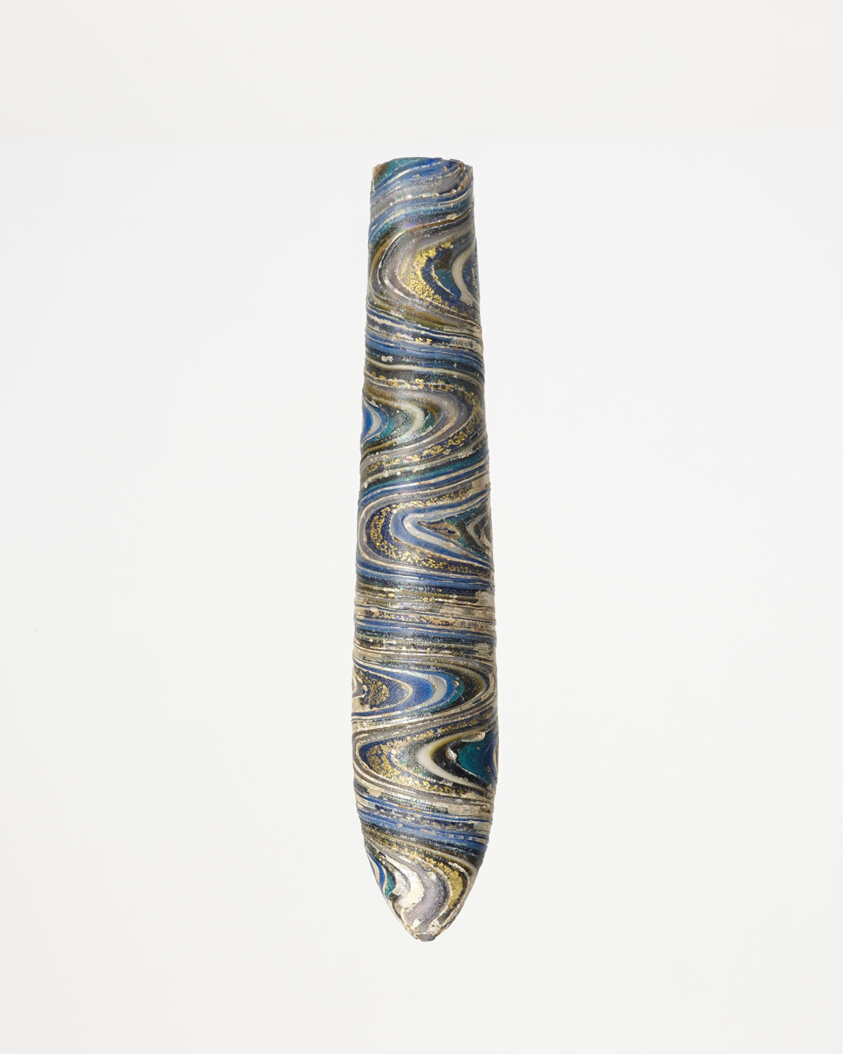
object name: Vessel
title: Alabastron (Container for Scented Oil)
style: roman (ancient, style or period), ancient, hellenistic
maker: Late Hellenistic or early Roman; eastern Mediterranean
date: Early 2nd-1st century BCE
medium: Glass, mosaic glass technique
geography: Eastern Mediterranean Region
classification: container; alabastron; glass; vessel; ancient art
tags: containers, beauty, rituals, scent